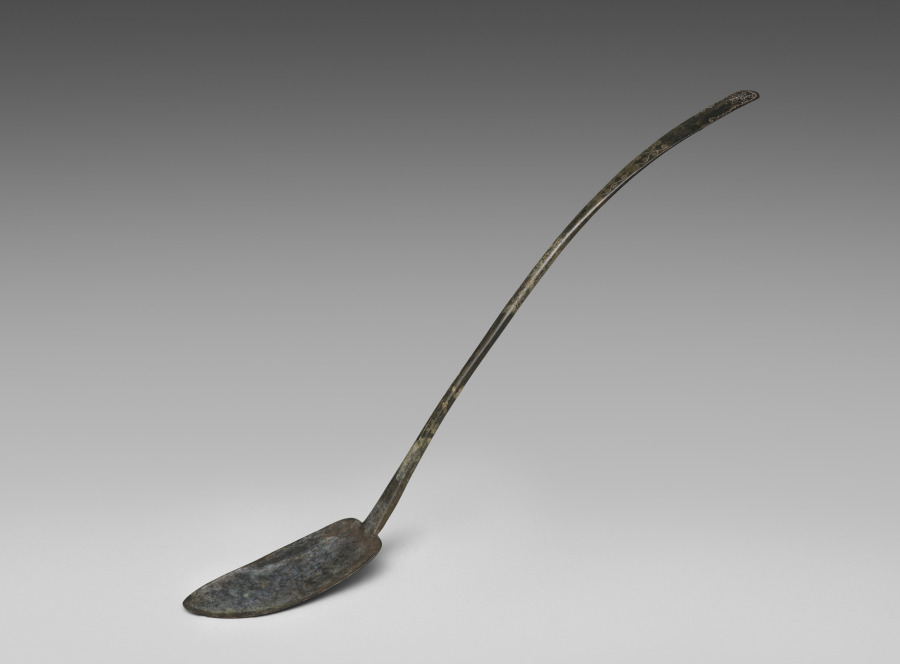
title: Spoon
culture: Korea, Goryeo dynasty (918–1392)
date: 918–1392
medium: silver bronze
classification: Metalwork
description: Celadons, spoons, seals, and bronze mirrors were the most common burial objects in tombs during the Goryeo period (918–1392). Furnishing tombs with an elaborate assemblage of objects was believed to honor and comfort the newly dead. Generally, Goryeo tombs were left untouched until the late 19th century. During the colonial period (1910–45), however, Japanese archaeologists hastily excavated the tombs located in Kaeseong, the former capital of the Goryeo period. Scholars recently have proposed that toward the end of the 14th century, Koreans enjoyed meat-based soups more than any other dishes, explaining why many more spoons than chopsticks were buried in tombs.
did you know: Bronze spoons are the most common burial item. Scholars have proposed that toward the end of the 14th century, Koreans enjoyed meat-based soups more than any other dishes, explaining why spoons became common household items as well as burial goods.